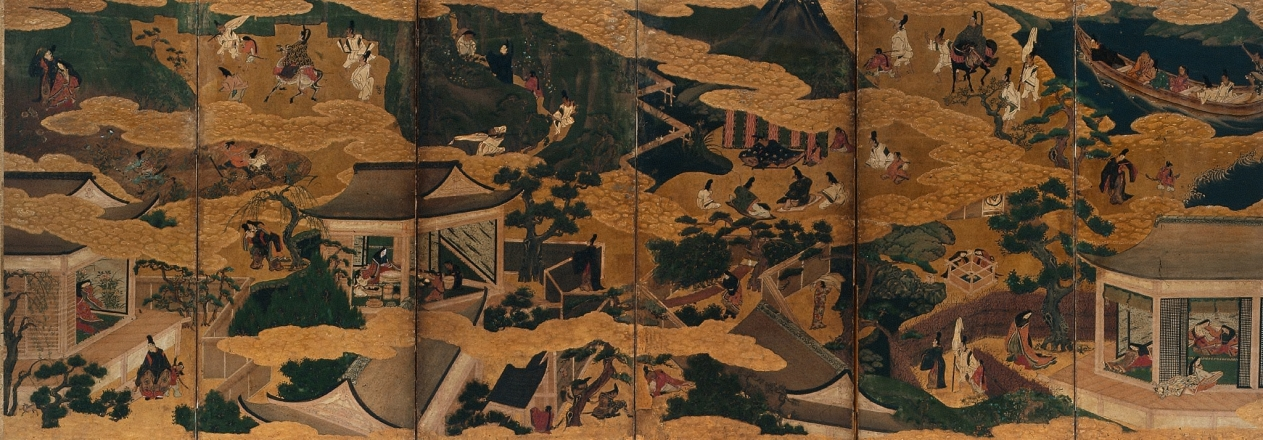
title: Scenes from the Tales of Ise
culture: Japan, Edo period (1615–1868)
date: mid-1600s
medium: One of a pair of six-panel folding screens; ink, color and gold on paper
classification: Painting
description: While the 11th-century Tale of Genji is universally regarded as Japan's literary masterpiece, the source for visual imagery in Japanese culture is rivaled by another literary classic, the Tales of Ise. A 10th-century anthology of poems interspersed with commentary, the Ise portrays the emotional and geographical journey of a courtier from the capital (Kyoto) into the countryside and beyond. The poems describe features of the natural, untamed terrain, linking them to the rather melancholy state of the traveler. Since the Tales of Ise was—and remains today—well read by educated Japanese, a person viewing these folding screens would immediately recognize its subject, organized as a series of discrete scenes read from right to left. Neither a signature nor a seal identifies the artist, but judging from related paintings, the work can be ascribed to an artist working in Kyoto during the first quarter of the 17th century in the manner of the painter Iwasa Matabei (1578–1650). This type of historical narrative composition became quite popular around 1600 among patrons favoring a distinctly Japanese style of painting which employed rich mineral pigments and a liberal use of gold.